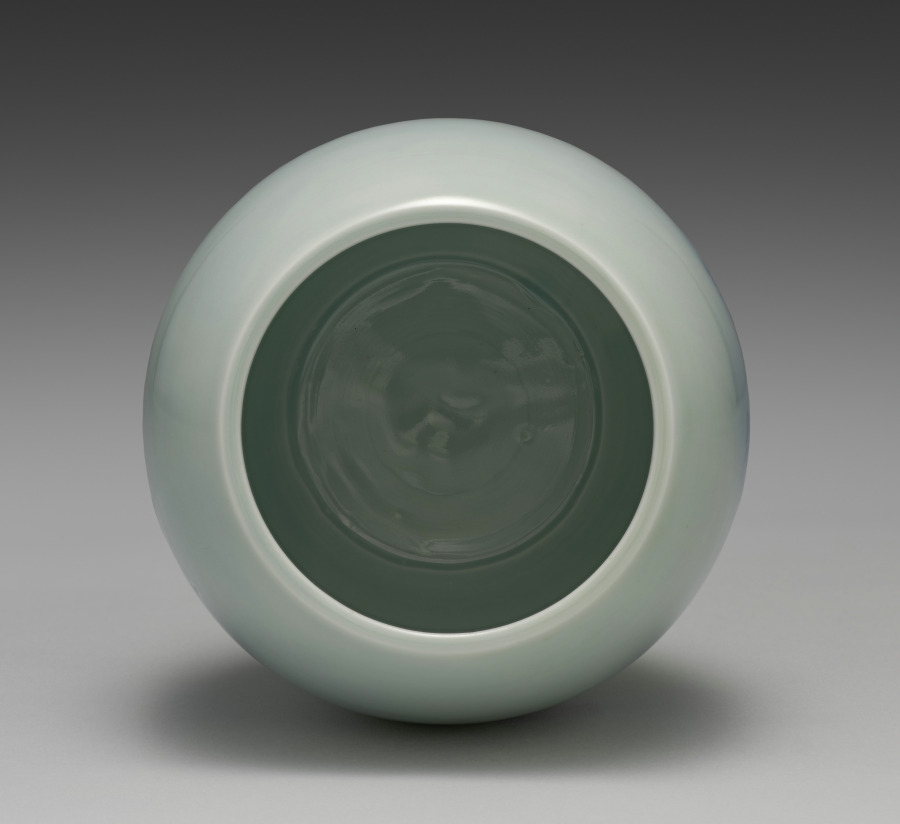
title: Water Container with Shell and Seaweed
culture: Japan, Meiji period (1868–1912) or Taishō period (1912–26)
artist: Seifū Yohei IV (Japanese, 1872–1951)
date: 1914–46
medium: Porcelain with underglaze blue, blue glaze and molded design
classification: Ceramic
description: Yohei IV chose an aquatic theme for this mizusashi. He applied clay to the surface and molded the shape of a large conch on one side and, on the other, a clam and a scallop. The finer details he incised into the surface of his low-relief shapes. He then painted seaweed as though it were coming out from behind the sea creatures, and he further set off the animals using a masking technique with a gradated blue surround. Finally, he applied a translucent blue glaze, identified on the box as mizusai, over the entire body of the vessel. The resulting effect is that one imagines having descended through the water to the ocean floor.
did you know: A mizusashi, water container, is an essential utensil for a tea ceremony.